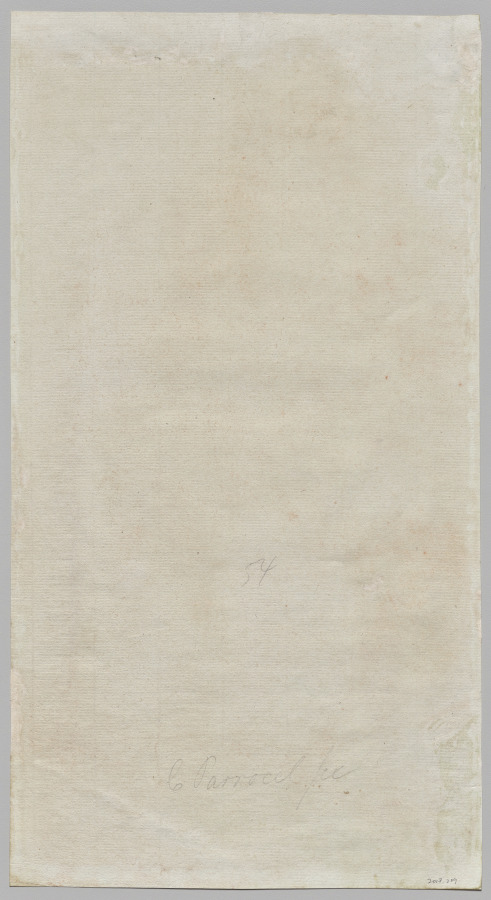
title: A Man Seated on the Edge of a Table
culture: France, 18th century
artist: Charles Parrocel (French, 1688–1752)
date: 18th century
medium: Red chalk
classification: Drawing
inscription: verso, lower center, in graphite: C. Parrocel fec.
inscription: verso, center, in graphite: 54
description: Known for his red chalk studies of cavalry men, this work is characteristic of Parrocel’s drawn oeuvre. Casually seated at the edge of a table with his arms crossed, the man gently smirks at something he sees. His costume suggests that he is a soldier, who has discarded his hat and weapon while he rests from his arduous labor.